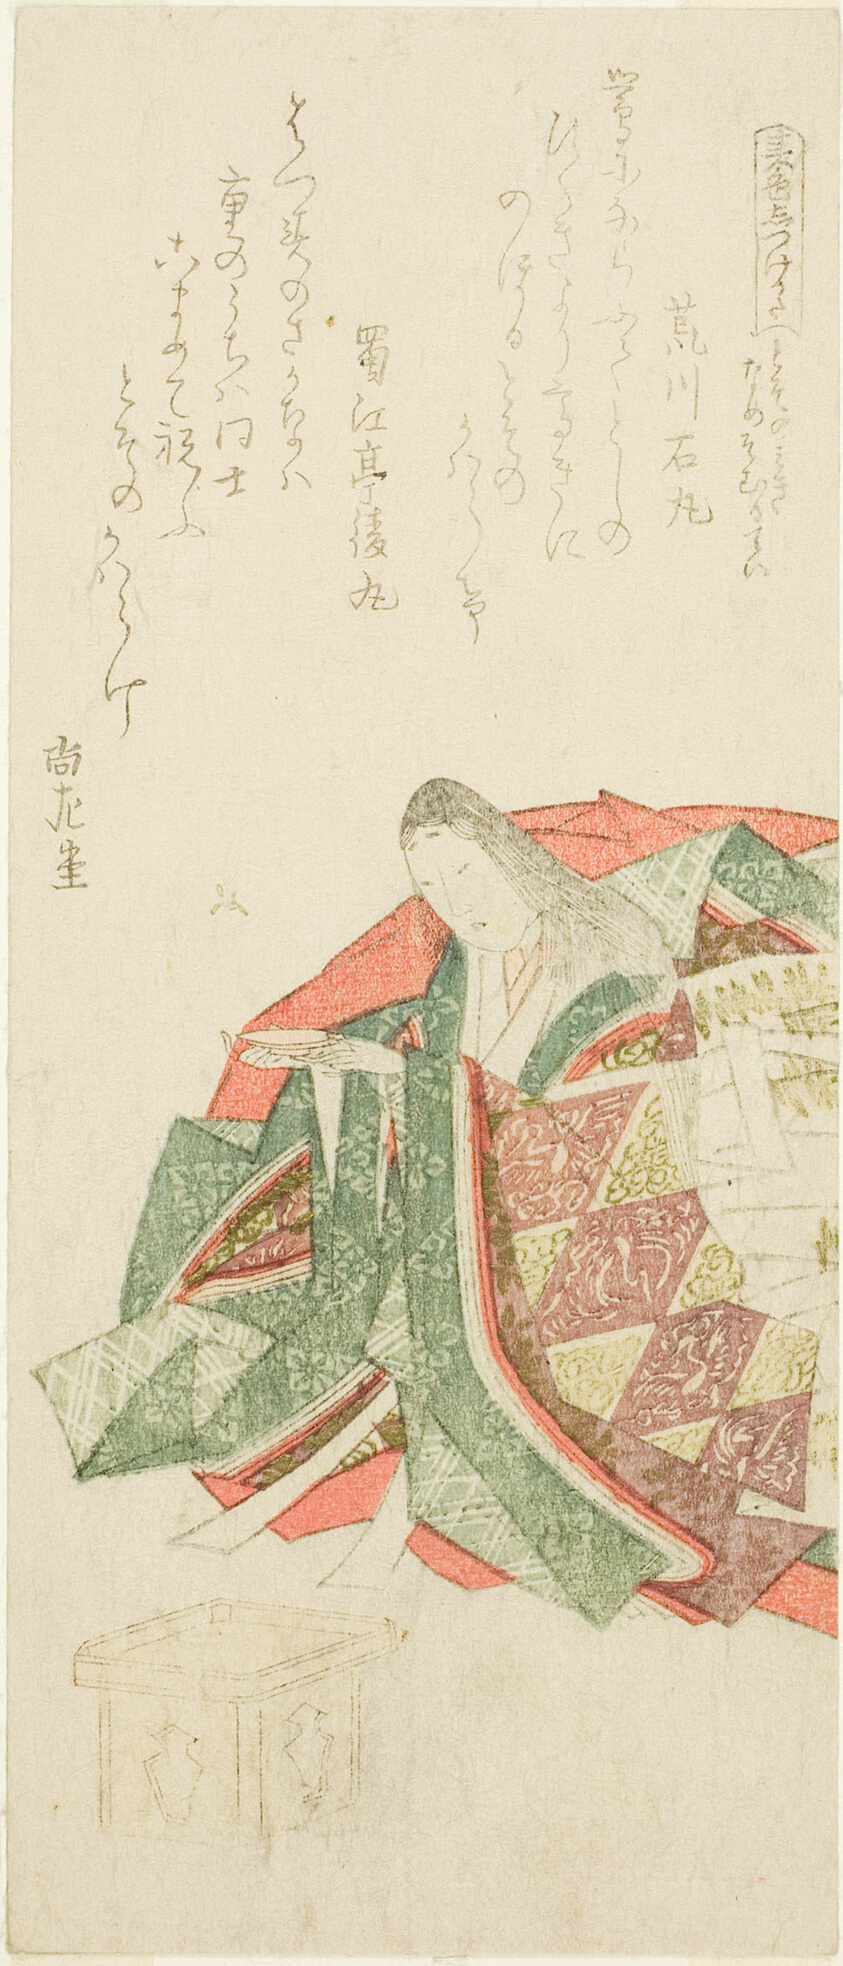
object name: Print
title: The Proper Way of Drinking New Year's Sake (Toso no miki namesomuru tei), from the series "Teaching Manners According to the Colors of the Spring (Shunshoku shitsukekata)"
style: Japanese (culture or style)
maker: Kubo Shunman (Japanese, 1757–1820)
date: c. 1807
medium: Colro woodblock print; koban, surimono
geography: Japan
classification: woodblock print; print; asian art